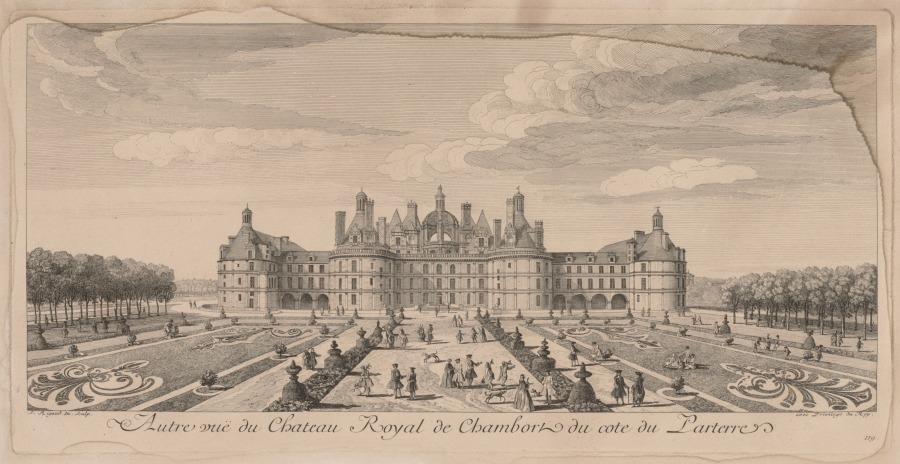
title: Chateau Chambord from the Gardens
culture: France, 18th century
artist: Jacques Rigaud (French, 1681–1754)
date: c. 1720–50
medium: engraving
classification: Print